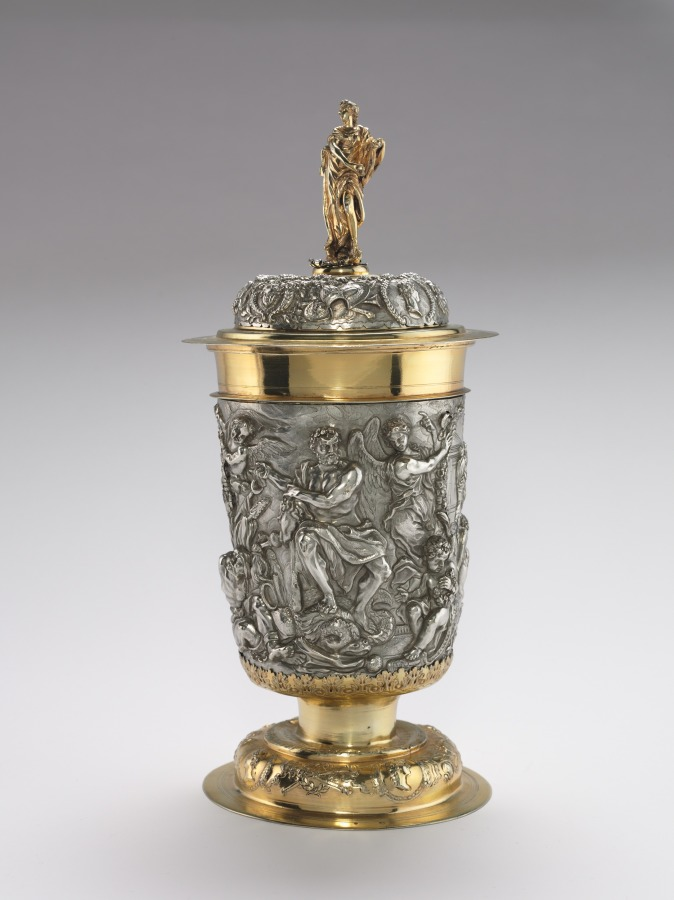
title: Covered Cup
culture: Germany, Augsburg, 17th century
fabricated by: Johann Andreas Thelot (German, 1655–1734)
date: 1688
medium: silver and gilt silver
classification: Metalwork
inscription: incised: J. A. Thélot. 1688.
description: Thelot was one of the most important silversmiths active in Germany in the late 1600s and early 1700s. The decorations of this cup refer to the defeat of the Turks in Central Europe in the 1680s.